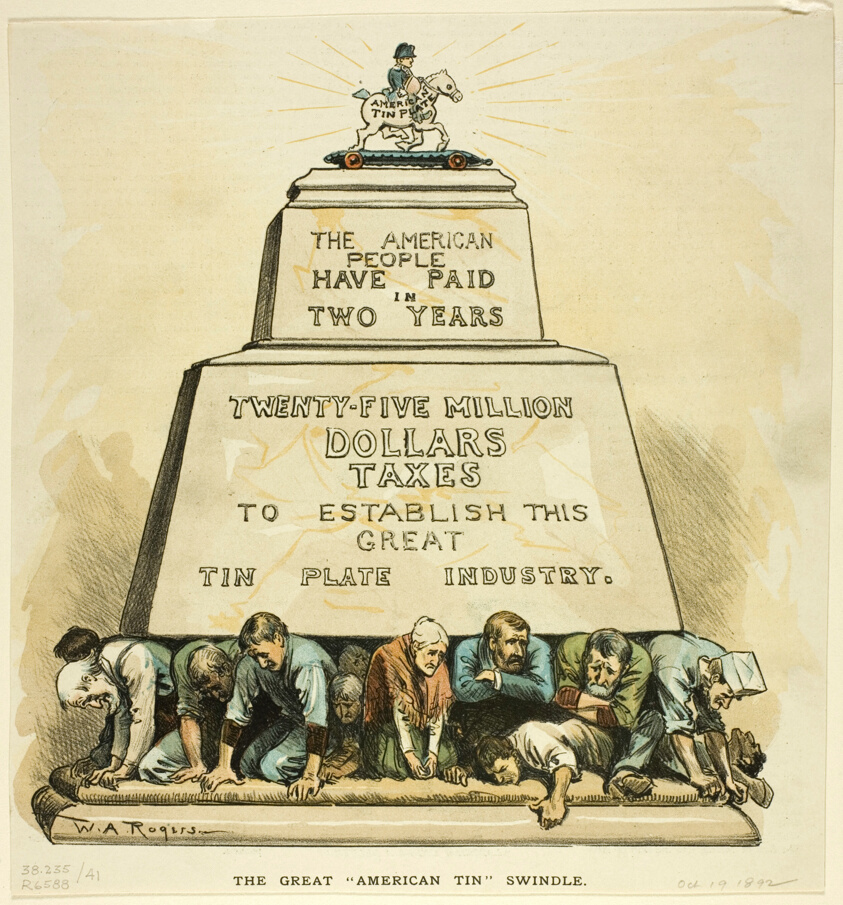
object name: Print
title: The Great American Tin Swindle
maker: William Allen Rogers (American, 1854-1931)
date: published October 19, 1892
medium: Color lithograph on newsprint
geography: United States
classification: lithograph; print; prints and drawing